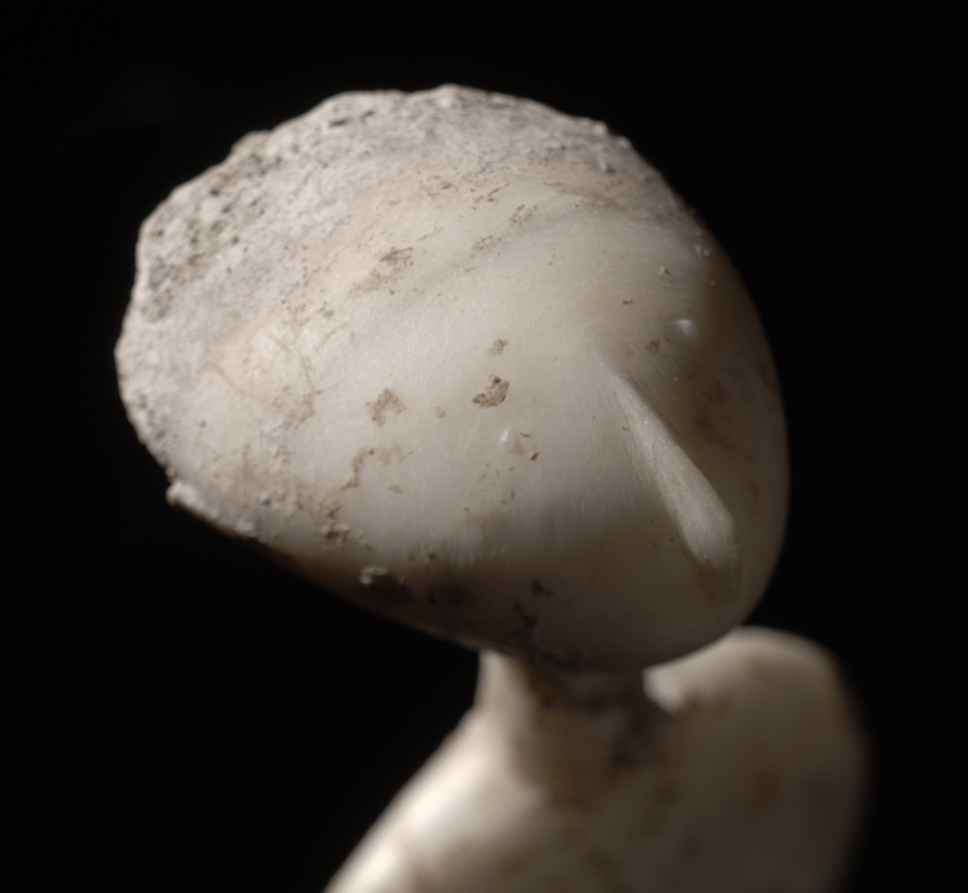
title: Statuette of a Woman: "The Stargazer"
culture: Western Anatolia, early Bronze Age (c. 3300–1200 BCE)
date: c. 3000 BCE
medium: marble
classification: Sculpture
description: "The Stargazer" moniker was given to this diminutive marble sculpture because its upturned head looks toward the heavens. Details carved into the stone are visible while painted features have been lost to time. We do not know how this object was used, but its enigmatic nature invites speculation.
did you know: We can identify this mysterious figure as female by the inscribed pubic triangle below her waist.